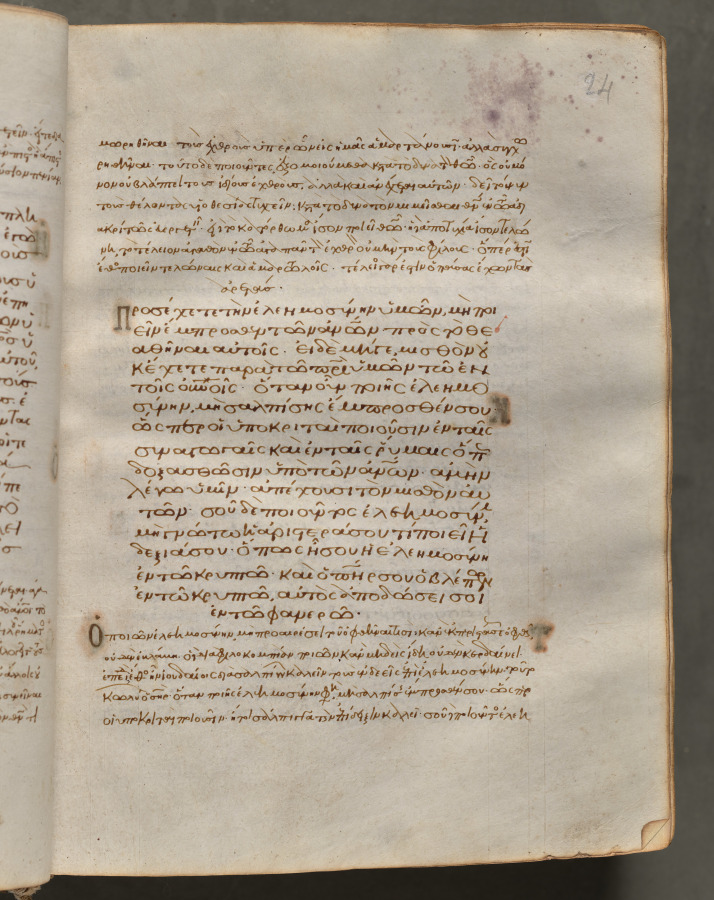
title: Text, folio 24 (recto), from a Gospel Book with Commentaries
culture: Byzantium, Constantinople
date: c. 1000–1100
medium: ink, tempera, and gold on vellum; leather binding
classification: Bound Volume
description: Each of the four gospels in this book opens on a page with brilliantly illuminated borders depicting the author of the text as well as birds-principally peacocks, symbols of the immortality of the soul-and fountains, representing the fountain of life and the salvation of the soul. This volume consists of 428 leaves with texts in Greek. Its level of sophistication suggests that it was probably written and decorated in a monastery in Constantinople.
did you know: Gospel Books were carried in procession through Byzantine churches.